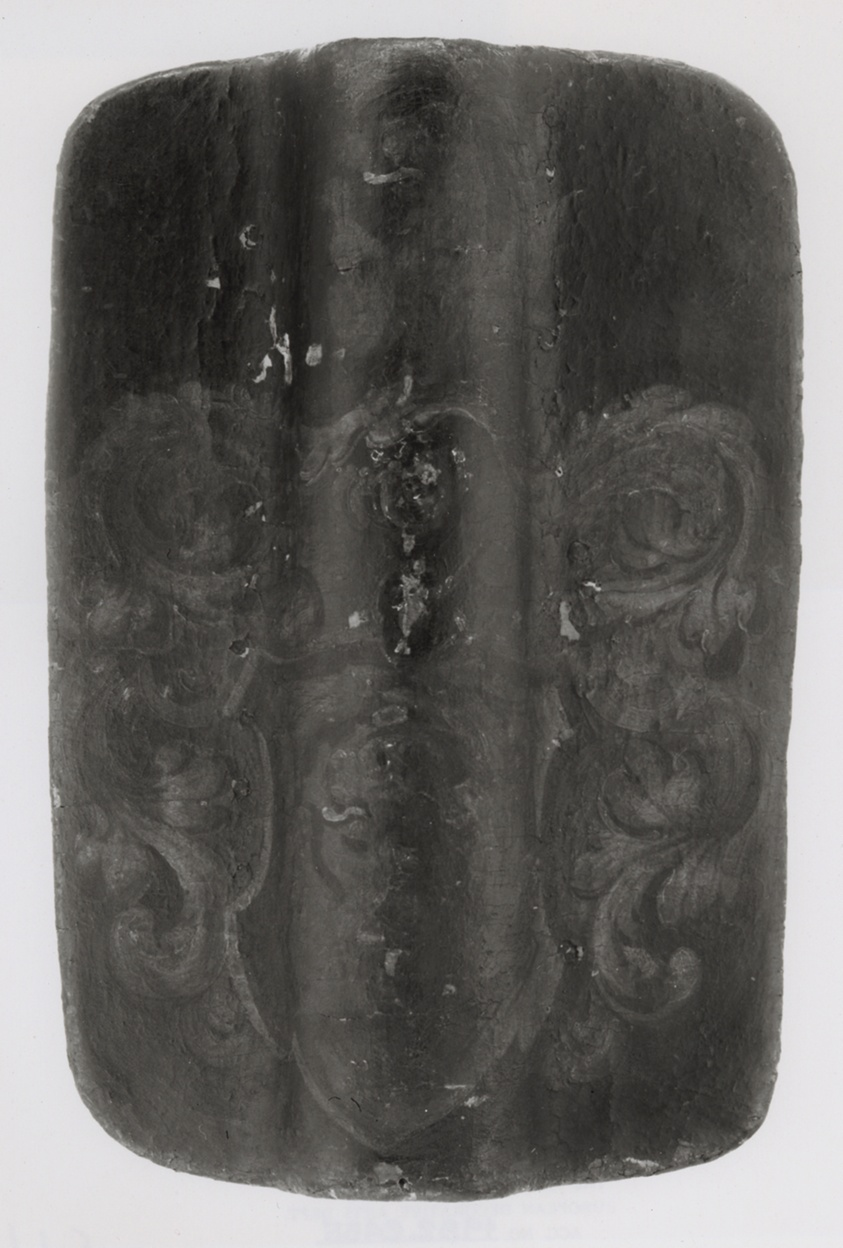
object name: Armor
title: Hand Pavise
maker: German, Nuremberg. possibly Bohemian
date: 1470/1500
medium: Wood, canvas, leather, paint, and gesso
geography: Nuremberg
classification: shield; armor; arms and armor